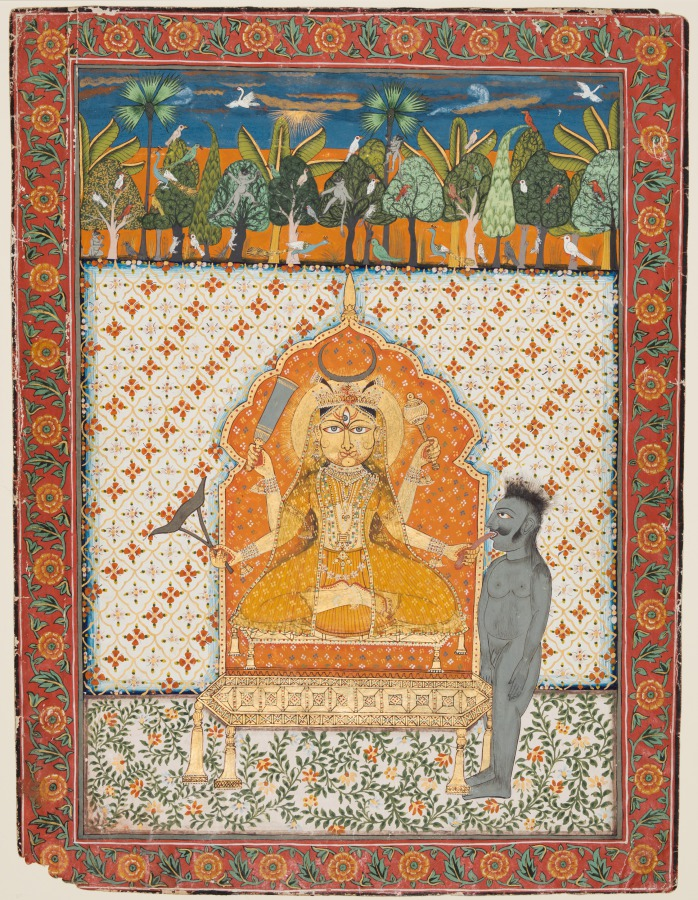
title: Devi Enshrined and Holding the Tongue of a Demon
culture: Northwestern India, Rajasthan, Rajput Kingdom of Sirohi; or Northern Deccan, Aurangabad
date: c. 1725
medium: gum tempera, gold, and silver on paper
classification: Painting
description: This enigmatic painting remains unidentified. Set in a forest teeming with wildlife, a four-armed goddess with three eyes and a crescent moon in her crown shows her dominance over a naked, ashen male figure standing to her left by clutching his tongue. In her right hands, she appears to hold agricultural implements, while in her upper left hand she holds a mace.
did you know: His spiky hair standing on end suggests that the naked figure is a demon.